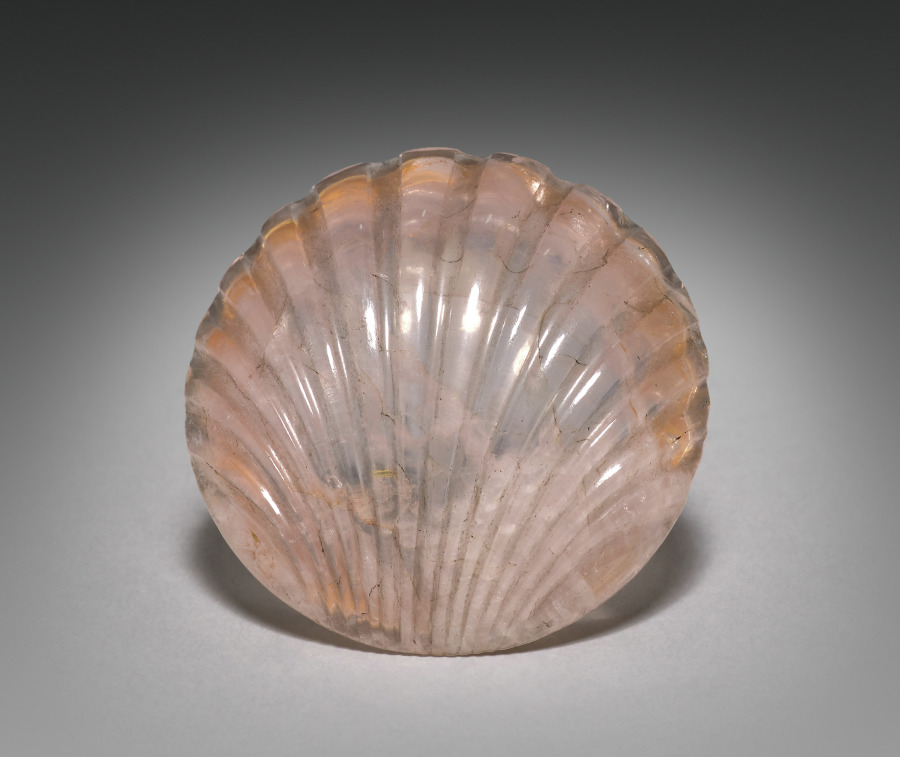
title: Shell-Shaped Box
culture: Italy (?), 19th century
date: late 1800s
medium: pink quartz, gold, enamel, diamonds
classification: Stone